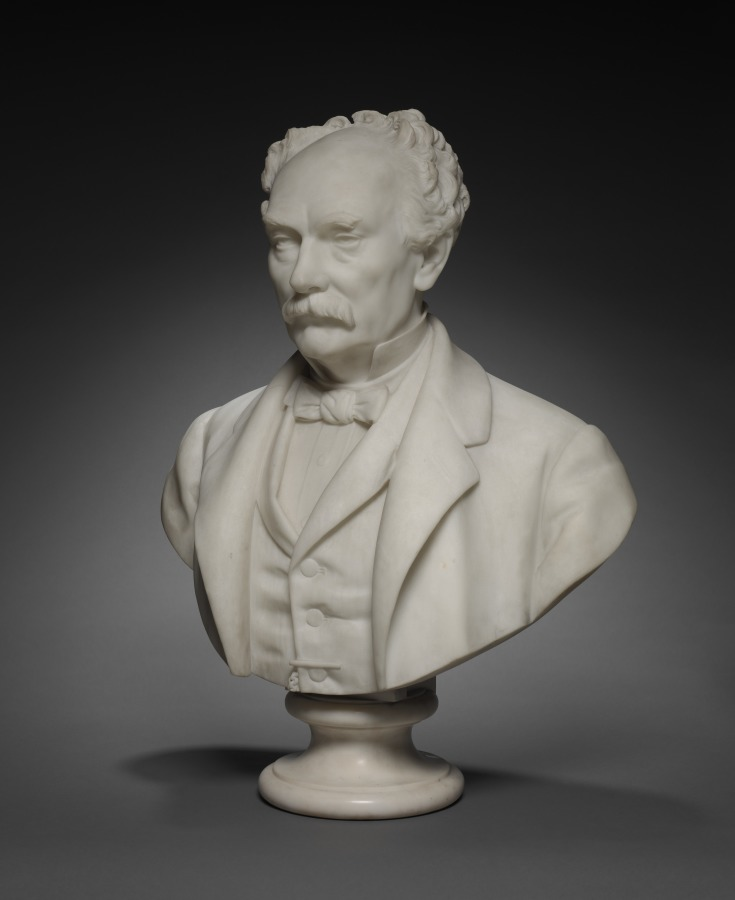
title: Bust of Hinman B. Hurlbut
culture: Italy, Rome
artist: Giovanni Cintselli (Italian, 1832–1883)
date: c. 1870–83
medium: marble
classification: Sculpture